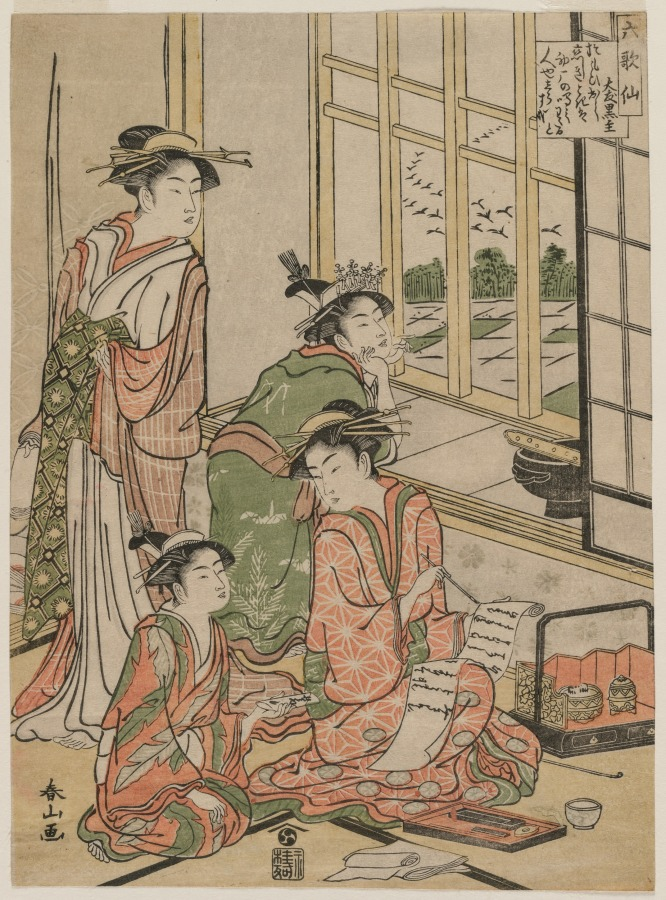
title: Courtesans at Leisure from the series The Six Immortal Poets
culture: Japan, Edo period (1615–1868)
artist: Katsukawa Shunzan (Japanese, active c. 1782–98)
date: early 1780s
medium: color woodblock print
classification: Print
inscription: Signature: Shunzan ga Publisher: Nishimuraya Yohachi (Eiju han, emblem)